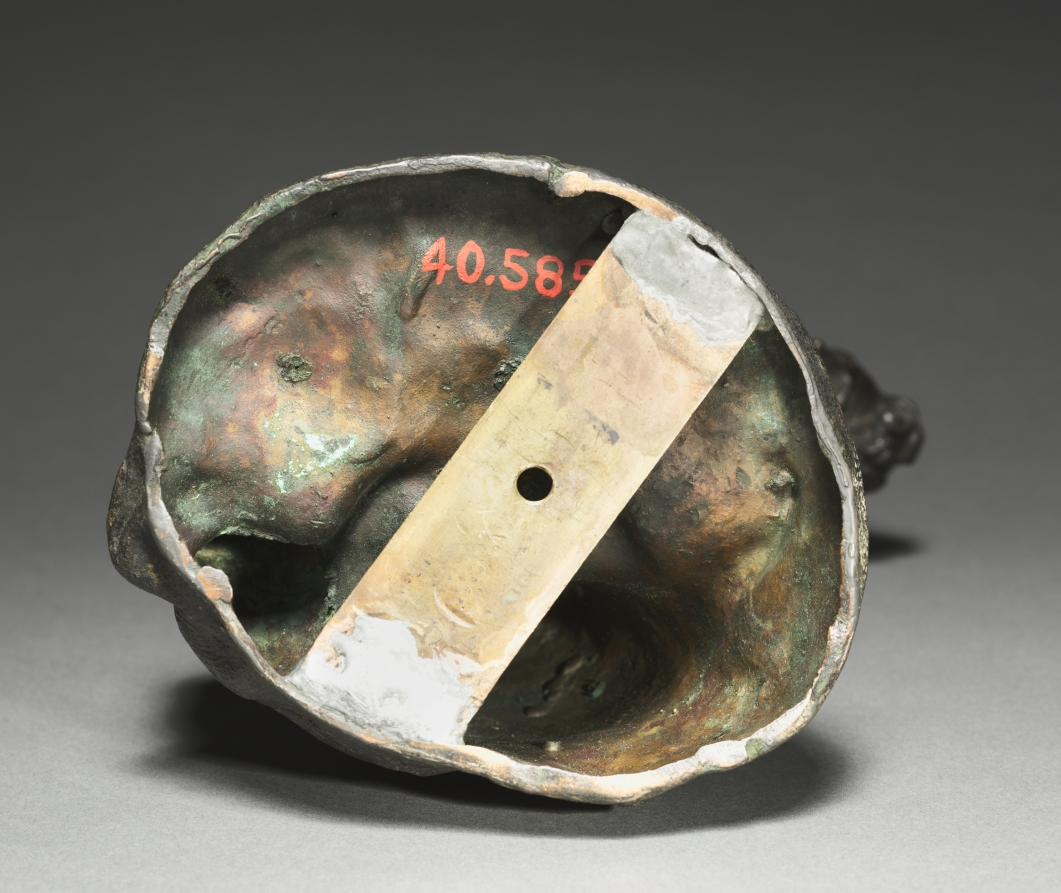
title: Saint Sebastian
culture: Germany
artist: cast after a model probably by Georg Petel (German, c. 1601-c. 1634)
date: 1620s or later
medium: bronze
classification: Sculpture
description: This composition is the subject of an ongoing attribution debate. The design is adapted from a painting by Adam Elsheimer, a German artist working Rome. This sculptural model exists in many versions; however, they vary considerably in their execution, complicating the identification, because they were clearly not made by a single sculptor or workshop. However, Georg Petel probably first created the design as he traveled across Italy in 1620–24, where his portrait was painted holding this composition.